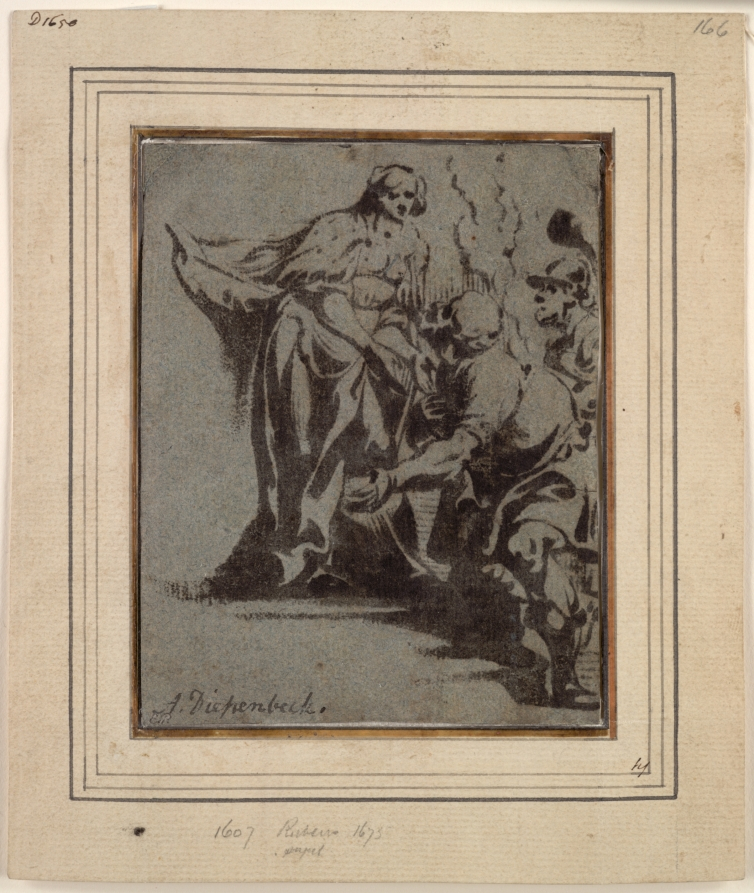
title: A Scene from Classical Mythology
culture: Belgium, 17th century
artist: Anthonis Sallaert (Flemish, c. 1590–1658)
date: 1600s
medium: monotype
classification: Print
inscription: bottom left, in brown ink: A. Diepenbeck; additional inscriptions on mounts Sotheby's sale 1799